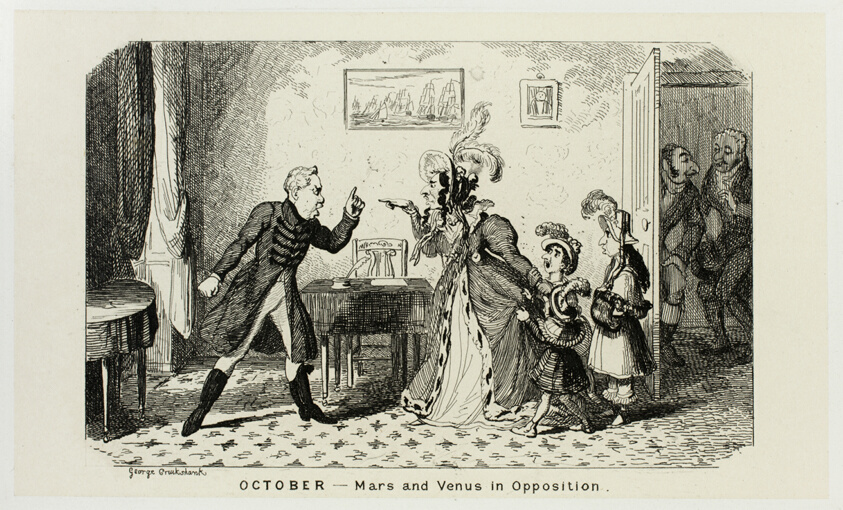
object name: Print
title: October - Mars and Venus in Opposition from George Cruikshank's Steel Etchings to The Comic Almanacks: 1835-1853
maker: George Cruikshank (English, 1792-1878); published by Pickering & Chatto (English, 19th century)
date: 1839, printed c. 1880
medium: Steel etching in black on cream India paper, laid down on off-white card (chine collé)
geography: England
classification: etching; paper; steel; print; prints and drawing